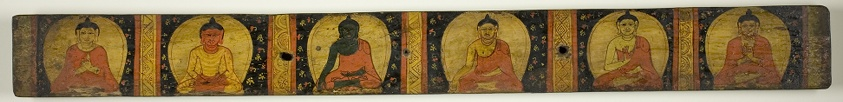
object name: Religious/Ritual Object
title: Manuscript Cover with Six Seated Buddhas with Various Hand Gestures (Mudras)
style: Himalayan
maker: Nepal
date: 12th century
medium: Pigments and metallic paint on wood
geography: Nepal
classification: manuscript; ritual objects